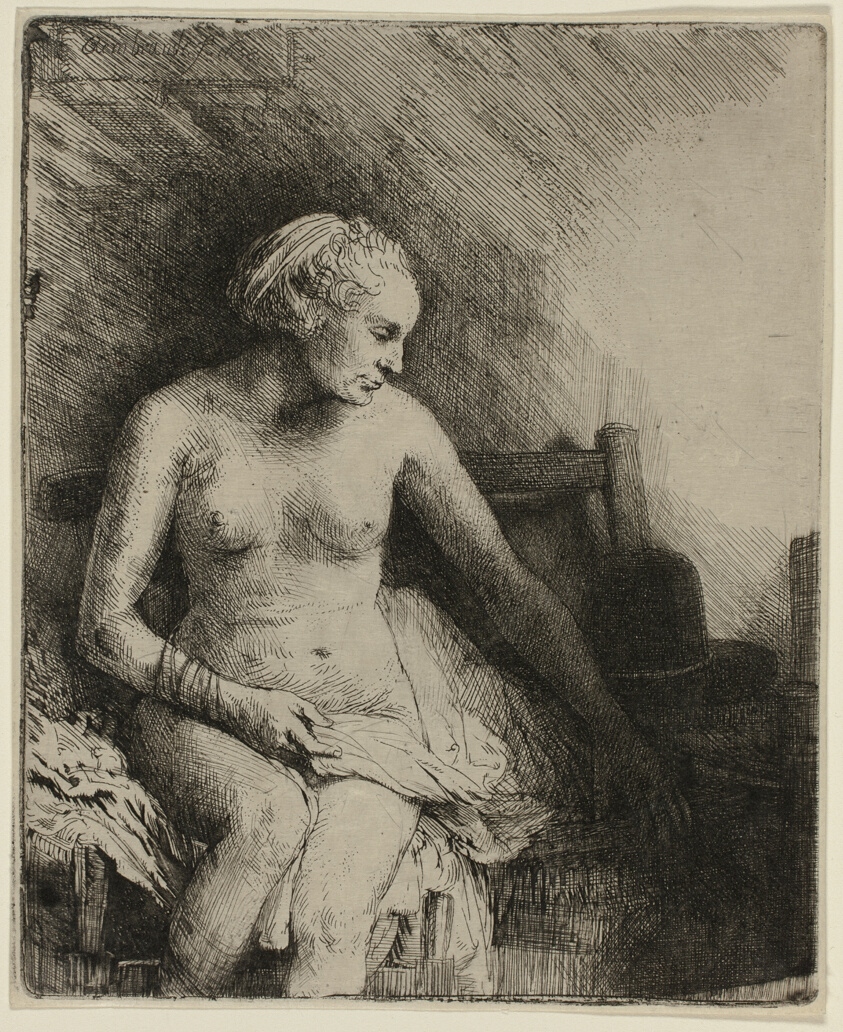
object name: Print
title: Woman at the Bath with a Hat Beside Her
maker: Rembrandt van Rijn (Dutch, 1606-1669)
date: 1658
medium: Etching and drypoint in black on ivory Japanese paper, laid down on ivory Japanese paper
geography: Netherlands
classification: etching; paper; print; prints and drawing; drypoint